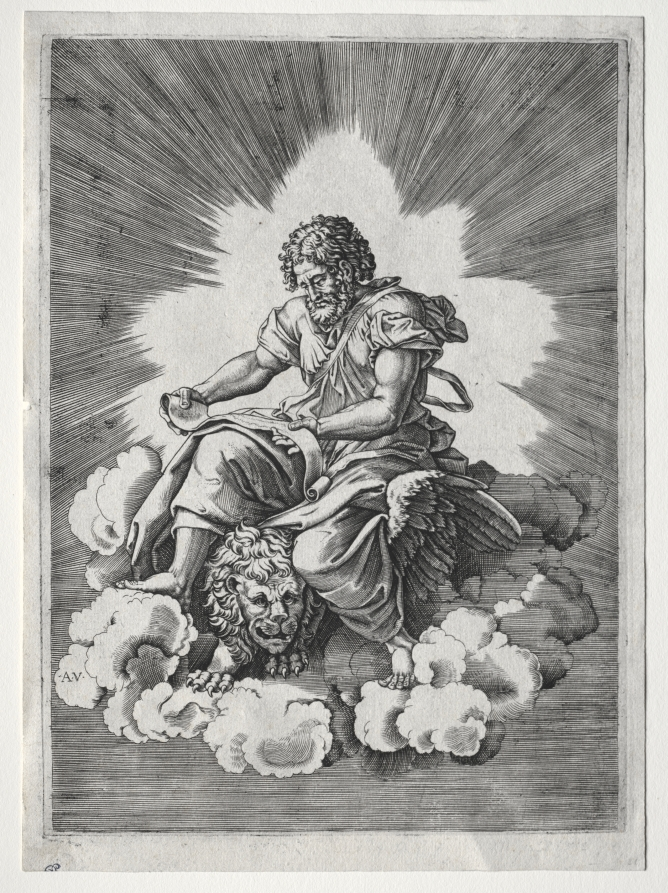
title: The Four Evangelists: St. Mark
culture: Italy, 16th century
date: c. 1518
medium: engraving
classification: Print